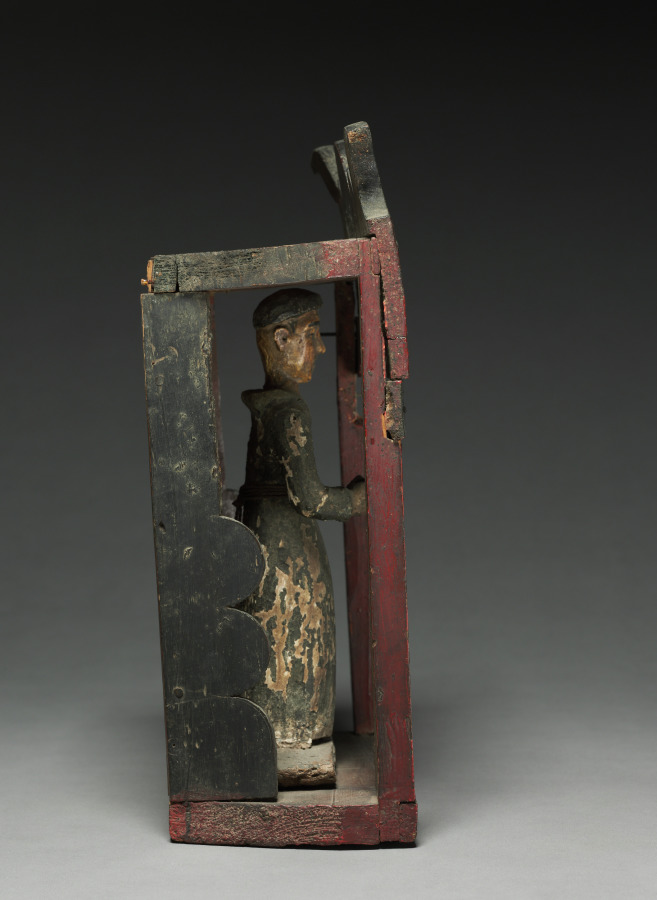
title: Figure with Nicho: santo de bulto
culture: America, New Mexico, 17th-18th century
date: 17th-18th Century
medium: painted wood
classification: Sculpture